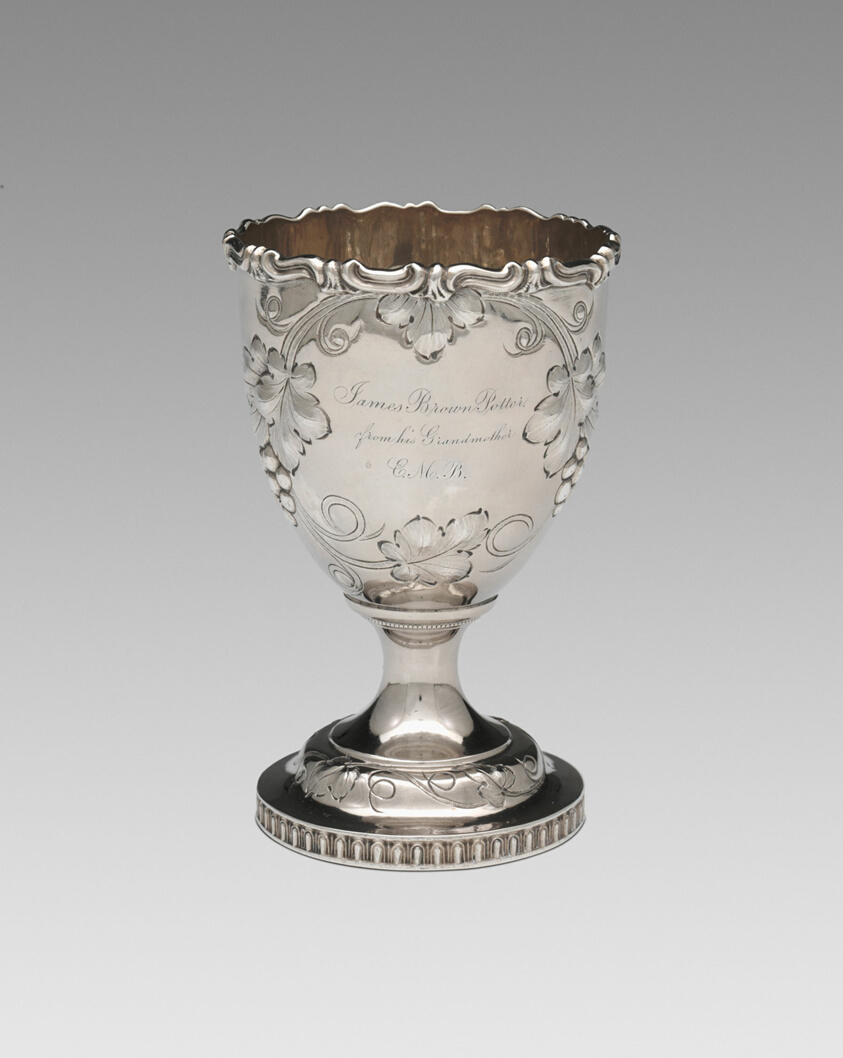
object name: Metalwork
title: Goblet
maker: William Gale & Son (American, 1850–58; 1862–66); New York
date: 1852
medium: Silver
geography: New York City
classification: drinking vessel; silver; american decorative arts; american arts; decorative arts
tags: dining, drinking